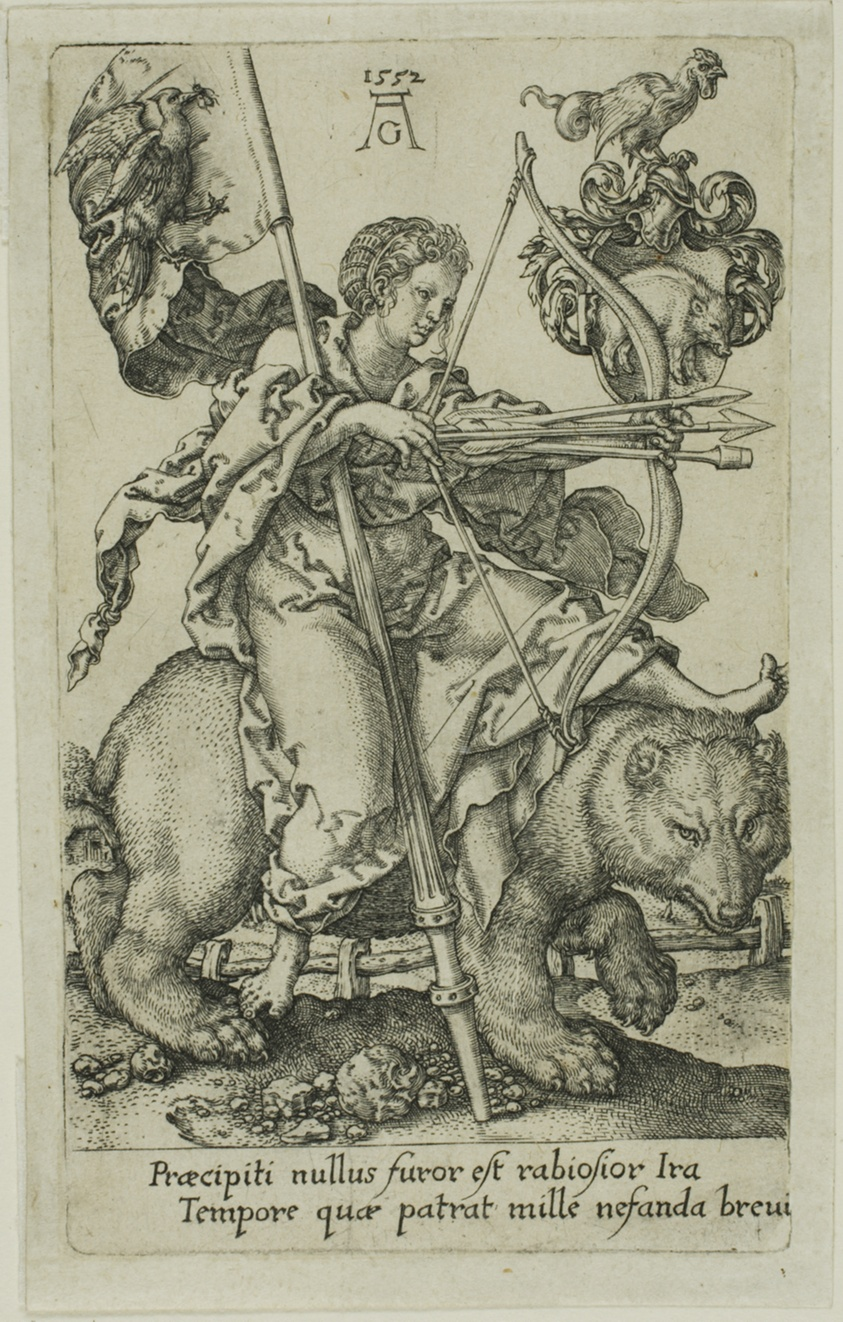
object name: Print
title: Wrath, from the Vices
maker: Heinrich Aldegrever (German, 1502-c.1560)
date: 1552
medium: Engraving in black on ivory laid paper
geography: Germany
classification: engraving; print; prints and drawing